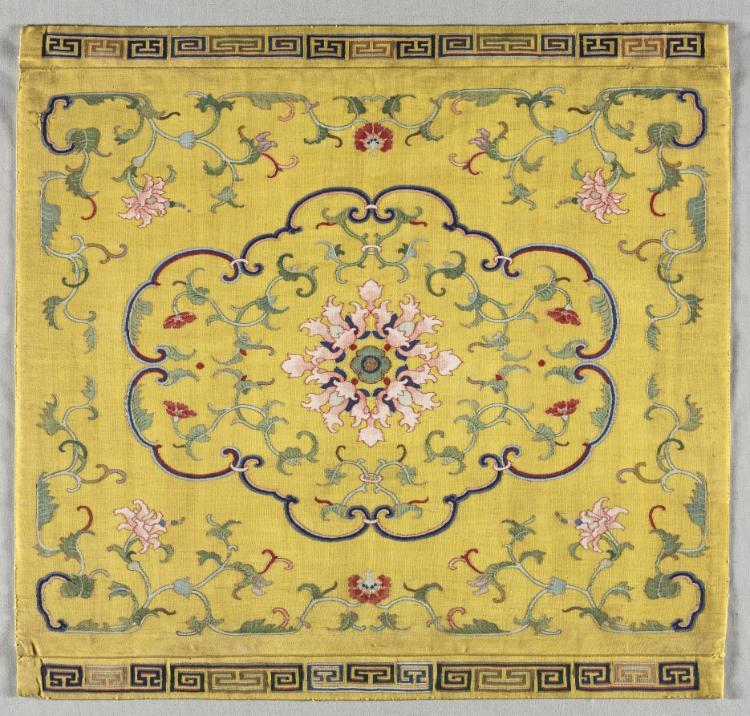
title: Cushion Cover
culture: China, Qing dynasty (1644-1911)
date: 1700s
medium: silk, metallic thread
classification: Textile